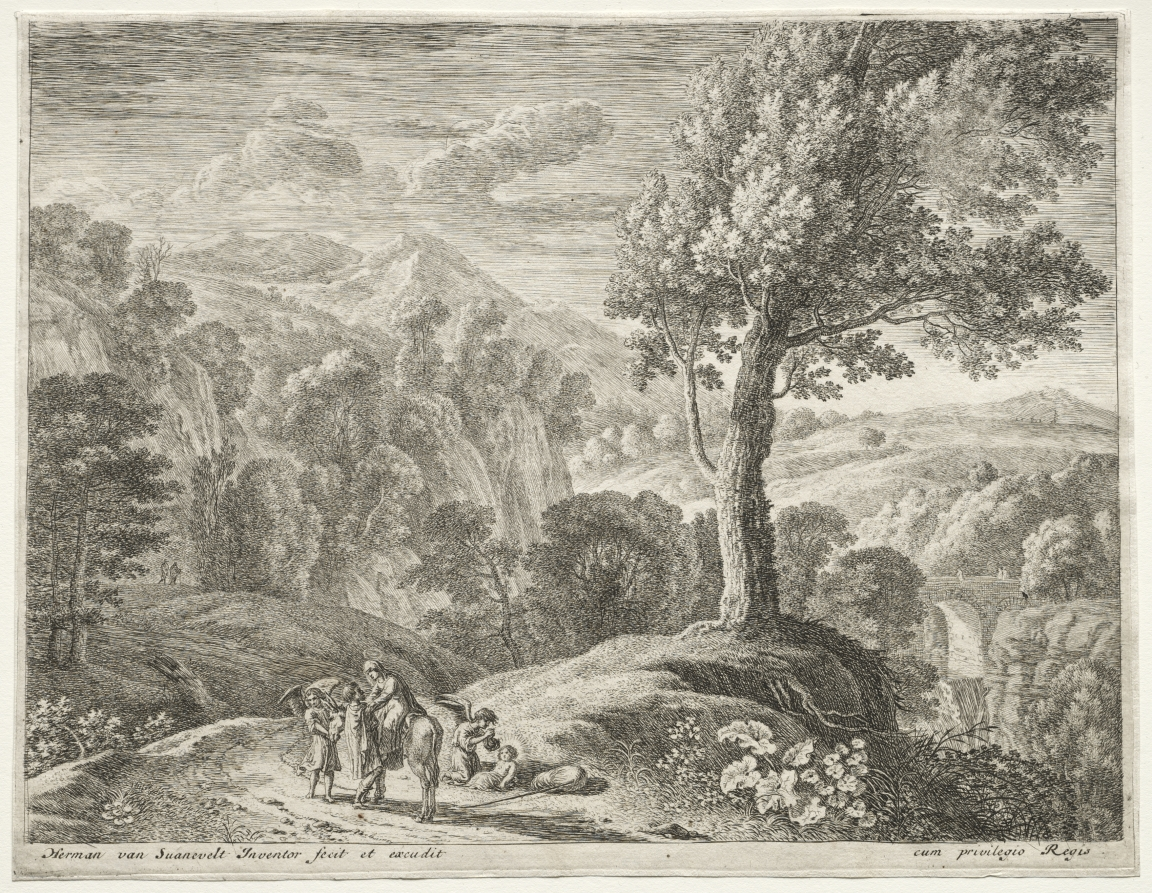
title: The Flight into Egypt: The Large Tree and the Cascade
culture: Netherlands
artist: Herman van Swanevelt (Dutch, c. 1600–1655)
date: c. 1652–54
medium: etching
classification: Print